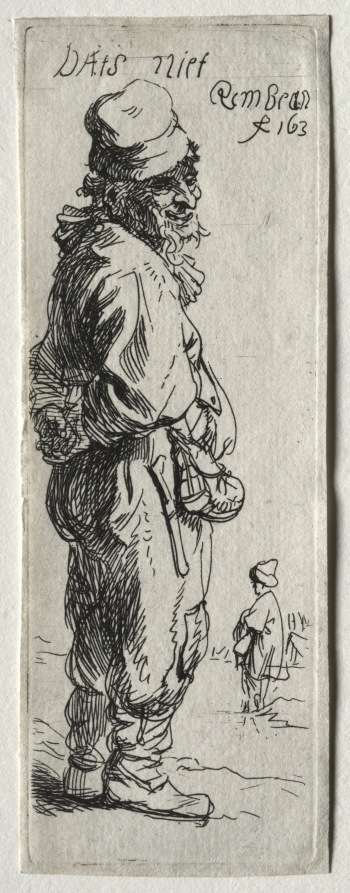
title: A Peasant Replying: "that's nothing"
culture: Netherlands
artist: Rembrandt van Rijn (Dutch, 1606–1669)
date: probably 1634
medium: etching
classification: Print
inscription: across top, in plate: Dats niet / Rembran / f 163 ; VERSO, upper center, in graphite: 16 ; lower lower, in graphite: a 61150 ; lower left, in graphite: /240 .4.-- ; lower center, in graphite: 171 ; lower right, in graphite: 134[crossed out] ; lower right, in graphite: H. 115